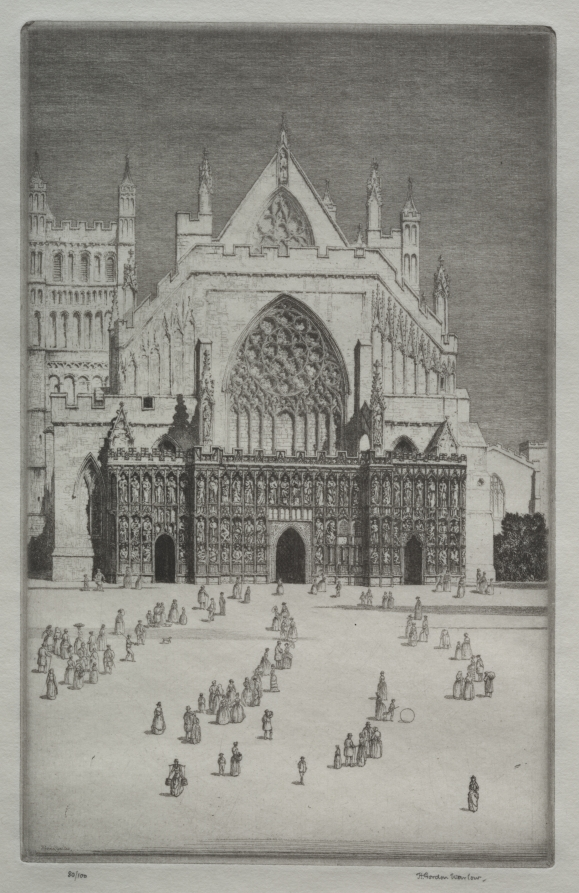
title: Exeter Cathedral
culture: England, 20th century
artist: Herbert Gordon Warlow (British, 1885–1942)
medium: drypoint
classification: Print